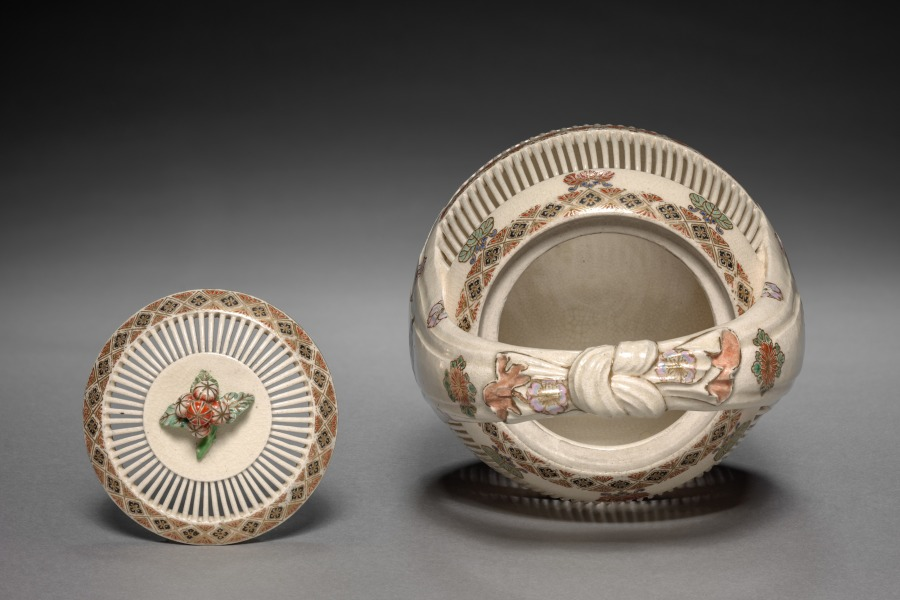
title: Jar: Satsuma Ware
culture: Japan, Edo period (1615–1868)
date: early to mid-1800s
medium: pottery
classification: Ceramic